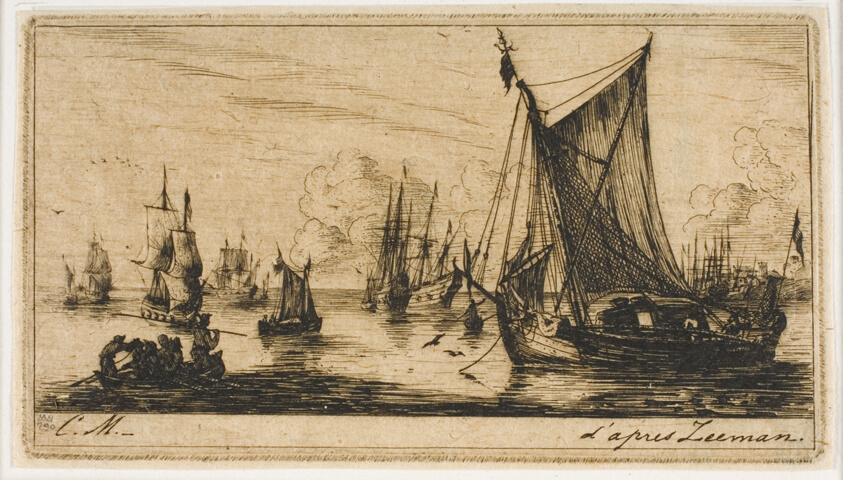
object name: Print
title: South Sea Fishers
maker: Charles Meryon (French, 1821-1868); after Reinier Nooms (Dutch, c. 1623-c. 1664)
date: 1850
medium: Etching, engraving, drypoint and roulette on tan wove paper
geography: France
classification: etching; print; prints and drawing